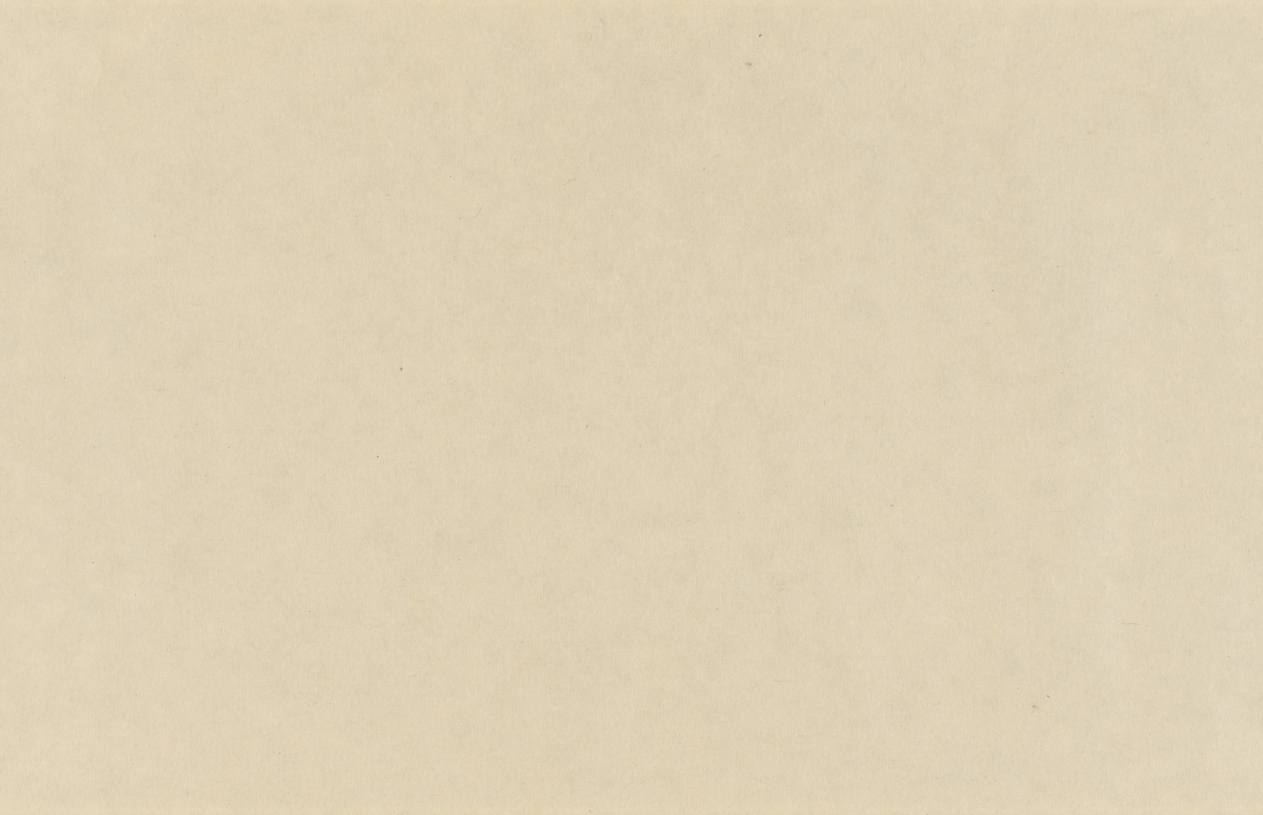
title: Eight Views of Xiao-Xiang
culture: Japan, Muromachi period (1392–1573)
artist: Sesson Shūkei (Japanese, c. 1492–c. 1577)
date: 1500s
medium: handscroll; ink on paper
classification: Painting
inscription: Signature and seal of artist at end of painting.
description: Eight Views of the Xiao and Xiang Rivers can be traced to 11th-century Chinese poems and paintings, the depiction of which had also become popular among Korean and Japanese painters. Xiao-Xiang refers to the region in present-day Hunan province where the Xiao and Xiang rivers converge. Few painters of the Eight Views had in fact seen the scenery; rather, they were trying to portray in ink and wash the lyrical qualities of dim light and a misty atmosphere typical of that region. Each of the poetic titles suggests a time of day, a season, or specific atmospheric conditions—subjects that challenged the abilities of the most talented artists. In this miniature painting (shukuzu) of the Muromachi period, Japanese Zen monk and painter Shukei Sesson depicted all eight views featured in Chinese prototypes: Wild Geese Descending to Sandbar; Returning Sails Off a Distant Coast; Mountain Market in Clearing Mist; River and Sky in Evening Snow; Autumn Moon over Dongting Lake; Night Rain on the Xiao and Xiang; Evening Bell from Mist-Shrouded Temple; and Fishing Village in Evening Glow.